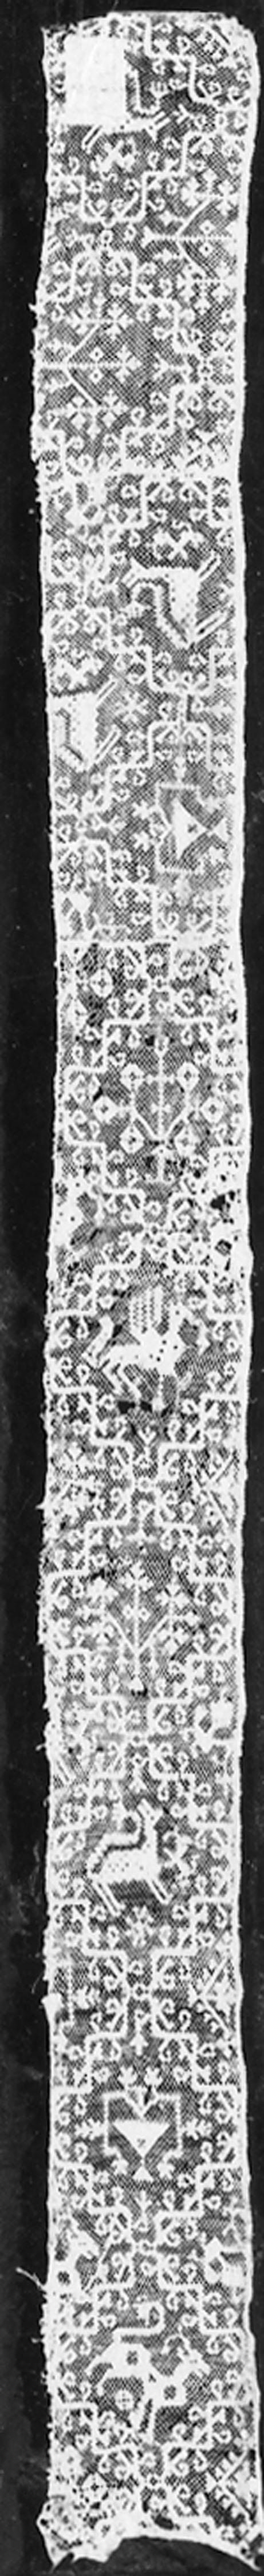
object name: Textile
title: Border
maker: France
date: 17th century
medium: Linen, knotted thread ground known as "filet" with darned in patterning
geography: France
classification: textile; needlework (visual works); needlework - lace